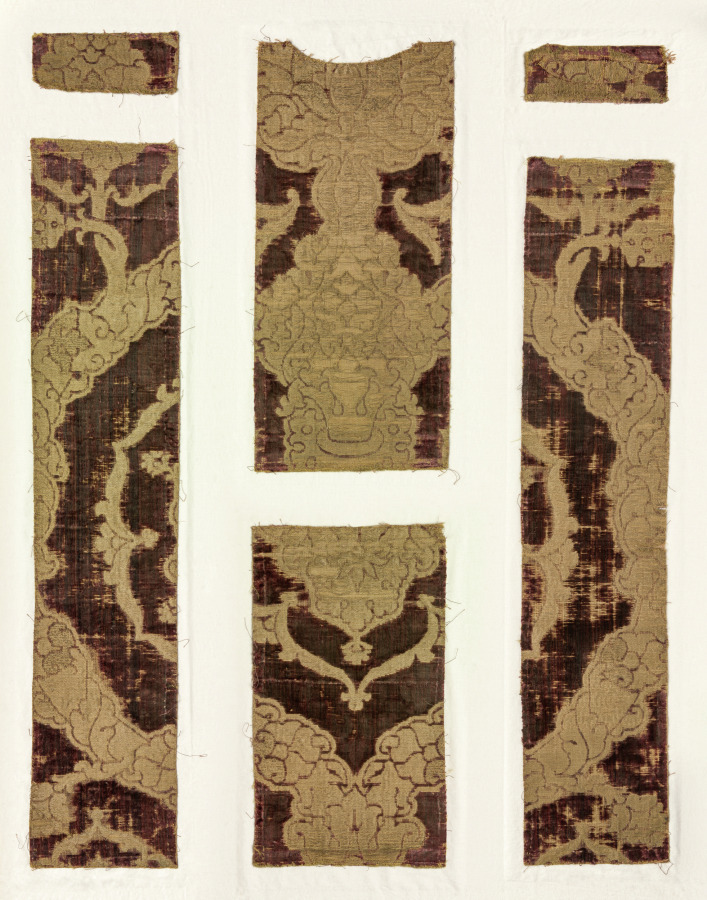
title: Fragments from Chasuble Front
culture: Italy, early 16th century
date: early 1500s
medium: velvet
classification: Velvet